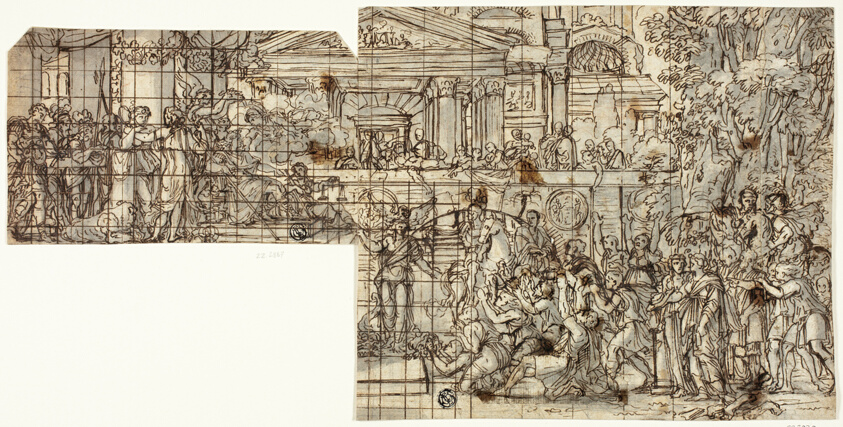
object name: Drawing and Watercolor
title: Triumph of Alexander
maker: Possibly François Chauveau (French, 1613-1676); or possibly Charles Le Brun French (1619-1690); or possibly Sébastien Bourdon French (1616-1671); or possibly Style of François Perrier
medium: Pen and iron gall ink, with brush and gray wash, and traces of red chalk, over traces of graphite, on cream laid paper, laid down on cream laid paper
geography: France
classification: pen and ink drawings; drawings (visual works); prints and drawing